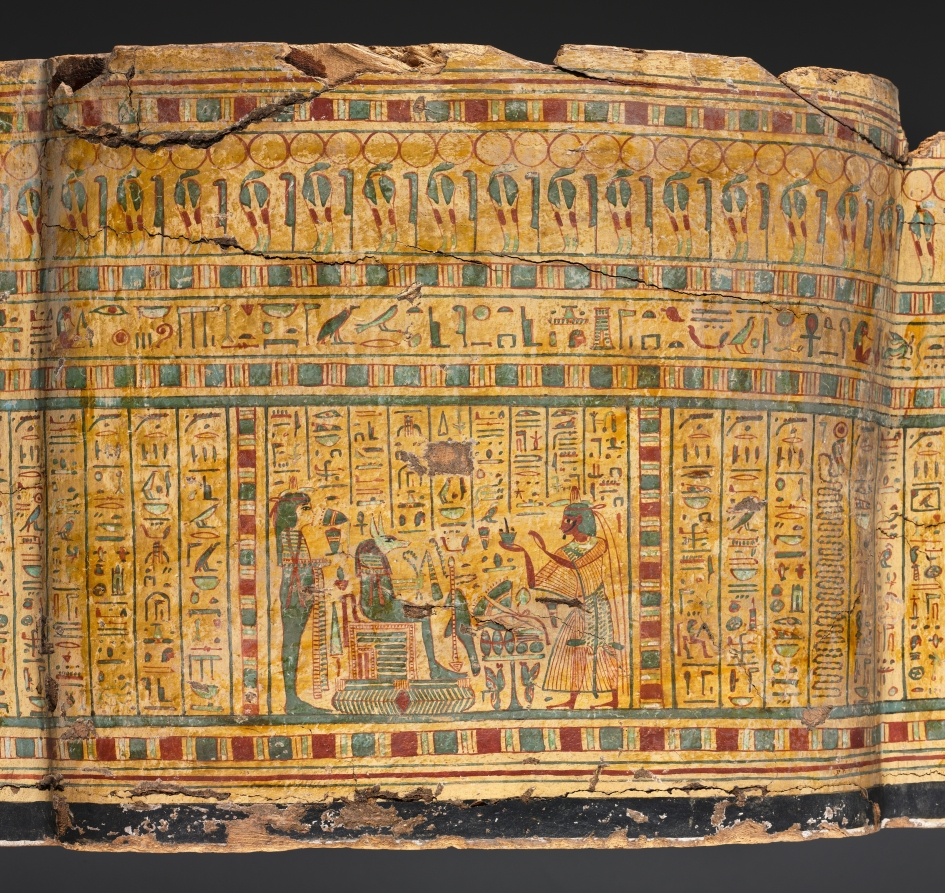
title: Coffin of Nesykhonsu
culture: Egypt, Thebes, Third Intermediate (1069–715 BCE), Dynasties 21–22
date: c. 976–889 BCE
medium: gessoed and painted sycamore fig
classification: Funerary Equipment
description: Egyptian coffins told stories and illustrated spells to help the deceased transition safely to the afterlife. Inside Nesykhonsu's coffin there are two jackals, one facing right and the other left, near the top. Here, the jackal represents the powerful deity Anubis, the god of the afterlife and embalming.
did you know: Two of Nesykhonsu's titles, "Lady of the House" and "Singer of the Choir of Mut the Great," are written on the outside of the coffin.